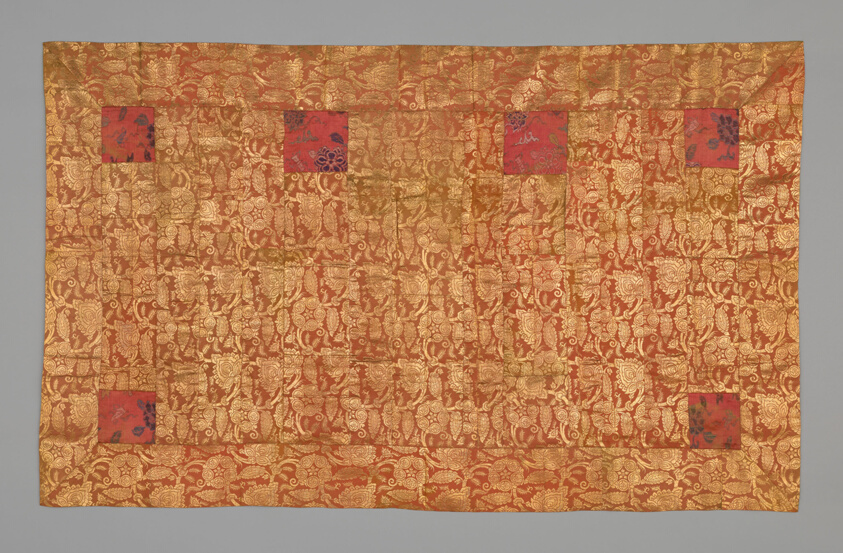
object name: Textile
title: Kesa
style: meiji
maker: Japan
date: Meiji period (1868–1912), late 19th century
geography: Japan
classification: textile; weaving; costume; liturgical - buddhist